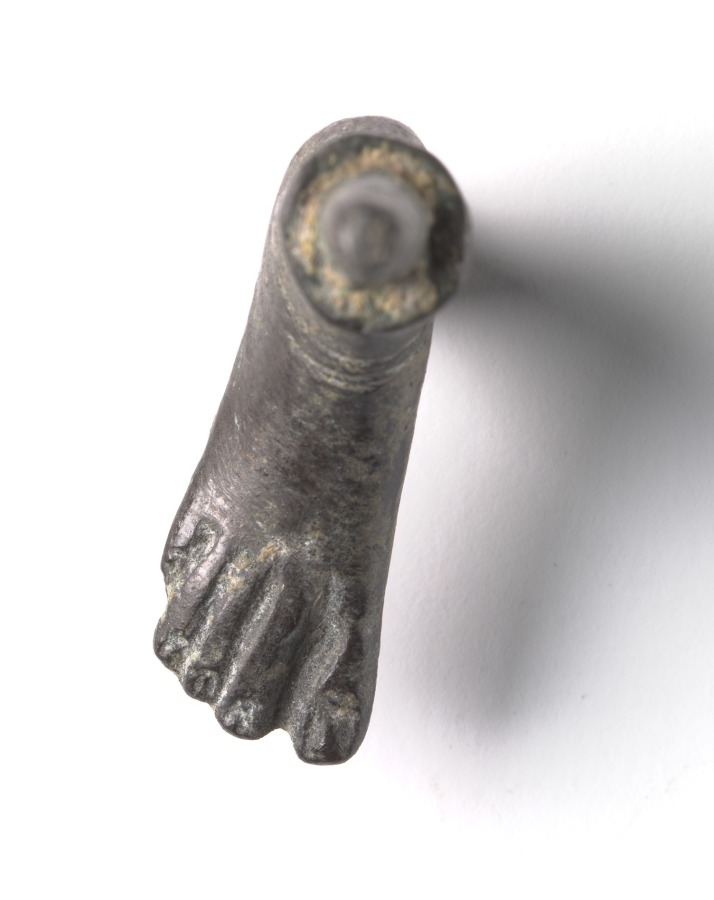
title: Bronze Mount from a "Shawabty Bundle": Right Foot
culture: Egypt, Thebes, Wadi Qubbanet el-Qirud, New Kingdom (1540–1069 BCE), Dynasties 18–19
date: c. 1336–1256 BCE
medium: bronze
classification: Funerary Equipment